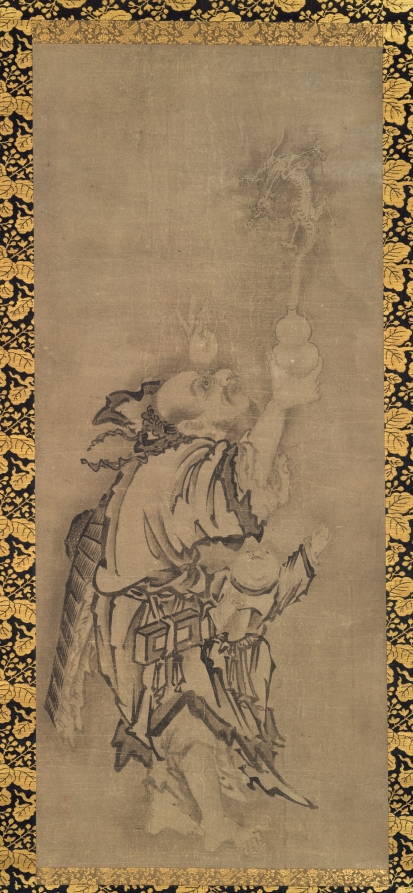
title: Hotei with Daoist Immortals: Immortal with Gourd and Dragon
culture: Japan, Edo period (1615–1868)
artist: Kyūseki Tomonobu (Japanese, 1653–1721)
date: late 1600s-early 1700s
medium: triptych of hanging scrolls: ink on paper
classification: Painting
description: Hotei was a Chan (Japanese: Zen) monk living in China during the 900s who, in the 1300s, became a legendary figure in Japan. At that time a popular cult praising him sprang up, extending beyond Zen to other religious communities. This rare triptych embraces a central Zen icon with flanking Daoist images, thereby suggesting the compatibility-rather than the exclusivity-of these two creeds. Hotei also enjoys popularity in Japan as a kind of genre, or folk figure, which explains his mirthful expression in Japanese paintings. The Daoist figures in contrast appear eccentric and foreign-looking, in keeping with Daoist lore. When these paintings came to the museum their appearance was compromised by poor quality textile mountings, and cracked paper surfaces deserving of restoration. The fact that these scrolls constituted an integral set that properly had to be shown as a unit heightened the need to stabilize their condition and improve their presentation for museum visitors. A complete remounting of each scroll occurred following the cleaning of the paper surfaces and the repair of the lifting surface areas. No inpainting was done, thereby preserving the original ink values and brushstrokes.